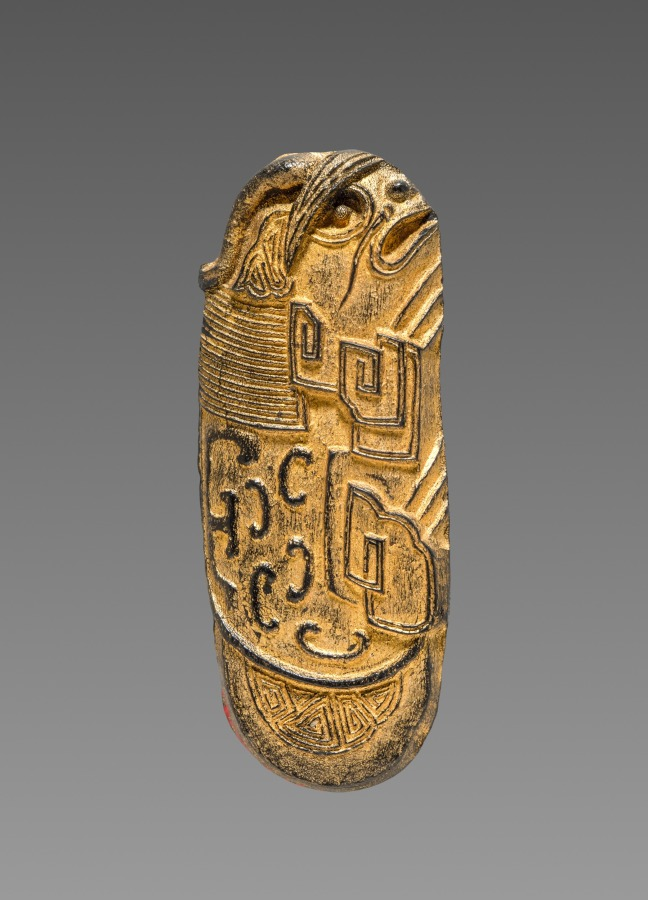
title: Ink Cake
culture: China, Qing dynasty (1644-1911)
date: 19th Century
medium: ink cake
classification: Miscellaneous